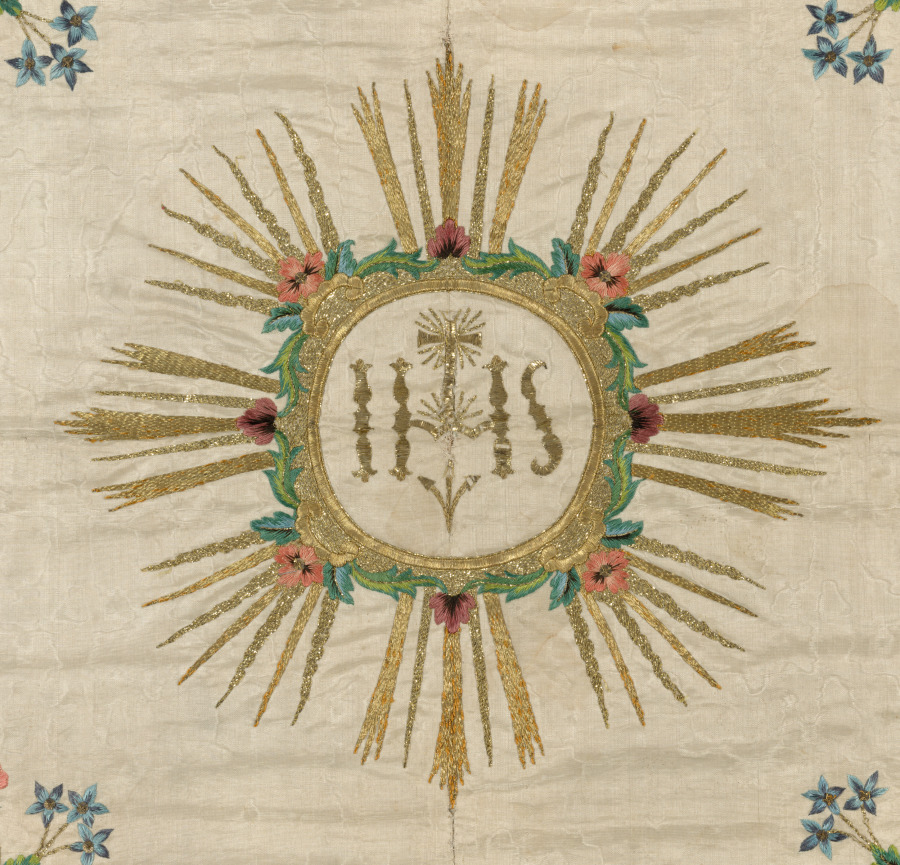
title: Chalice Veil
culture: Italy, 18th century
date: 1700s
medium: embroidery, silk and gold thread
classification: Embroidery